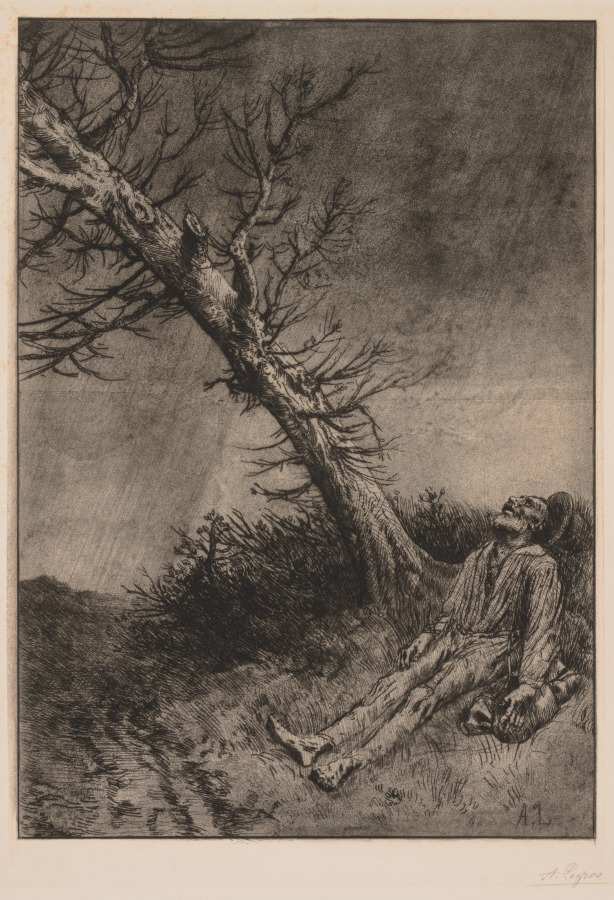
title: Death of the Vagabond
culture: France, 19th-20th century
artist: Alphonse Legros (French, 1837–1911)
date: c. 1875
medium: etching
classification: Print